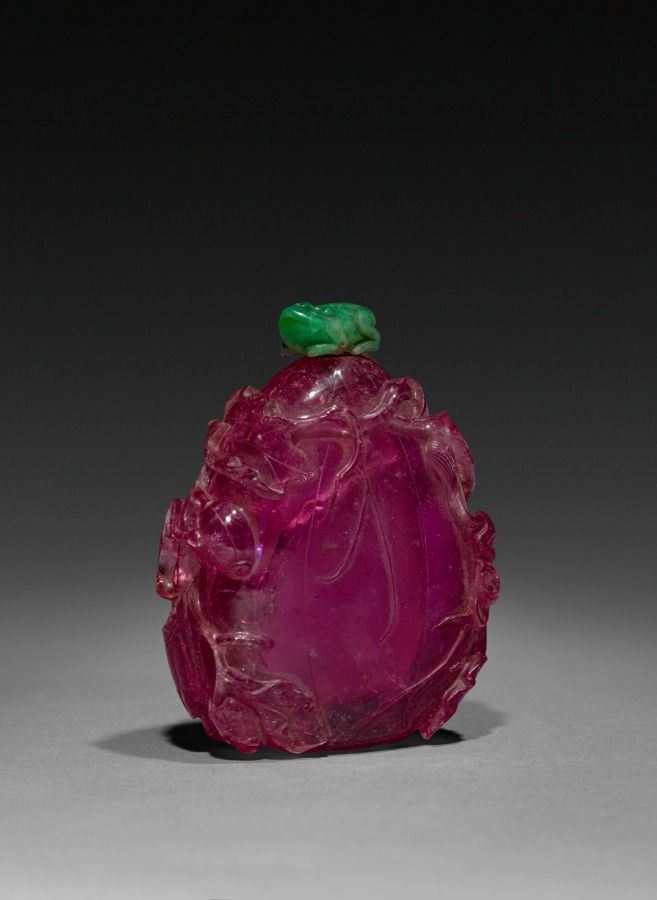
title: Snuff Bottle with Stopper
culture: China, Qing dynasty (1644-1911)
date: 1800s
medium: rose quartz and jade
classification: Stone